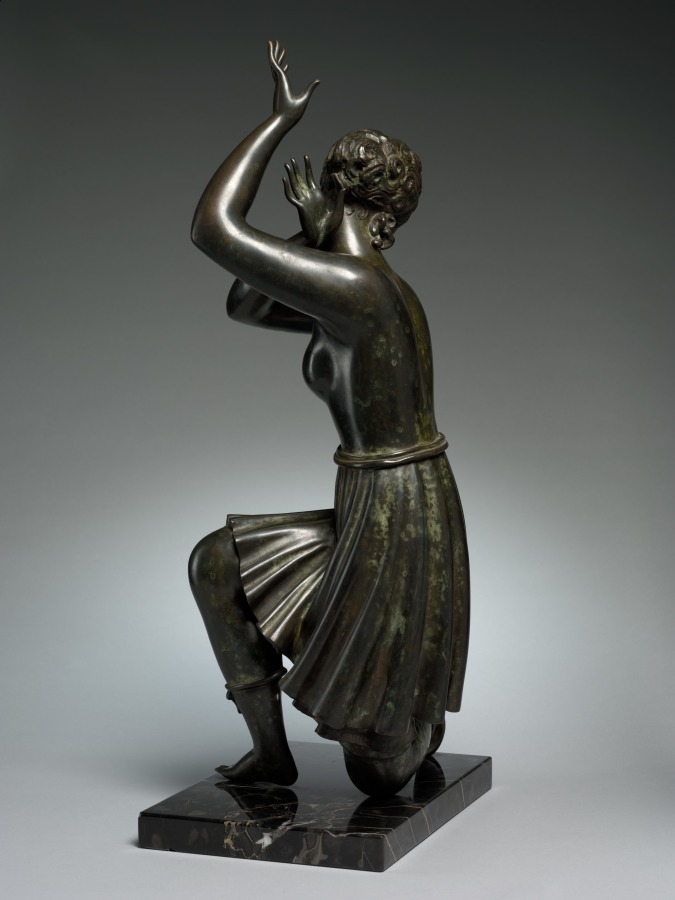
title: Dancing Figure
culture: America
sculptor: Elie Nadelman (American, born Russian Empire [now Poland], 1882–1946)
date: 1916–18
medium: bronze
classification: Sculpture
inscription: Signed: Elie Nadelman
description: Dancing Figure displays the geometrically simplified forms and softened angles that are a hallmark of Elie Nadelman’s work. Its spiraling composition presents a woman whose body partially twists on bended knee. Her raised arms echo the position of her legs.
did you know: A larger version of this sculpture was originally conceived in limestone to decorate an outdoor garden in Long Island.